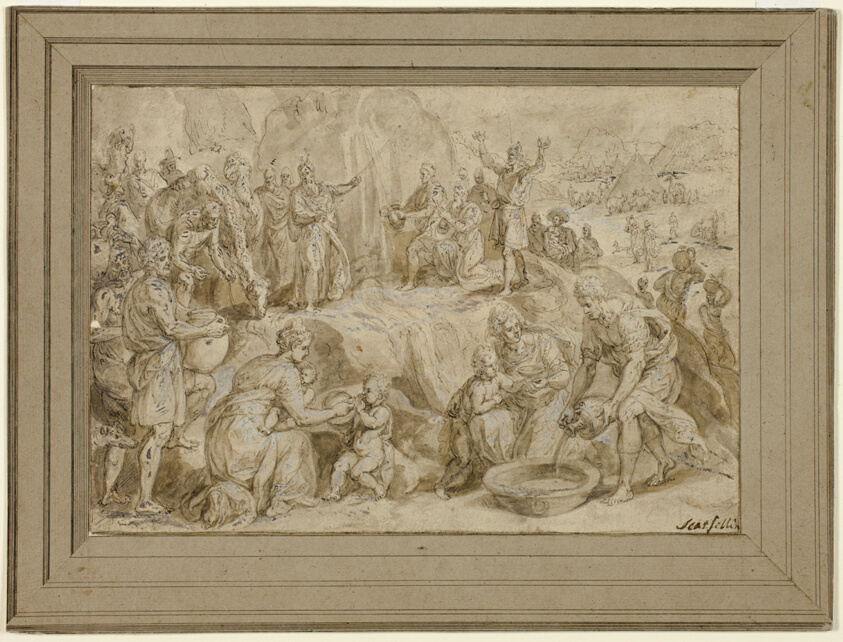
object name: Drawing and Watercolor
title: Moses Striking Water from the Rock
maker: Attributed to Crispin van den Broeck (Netherlandish, 1524-c. 1590); or Ippolito Scarsella (Italian, 1551-1620)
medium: Pen and brown ink, with brush and brown wash, heightened with lead white (discolored), on cream laid paper, laid down on card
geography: Netherlands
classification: pen and ink drawings; drawings (visual works); prints and drawing